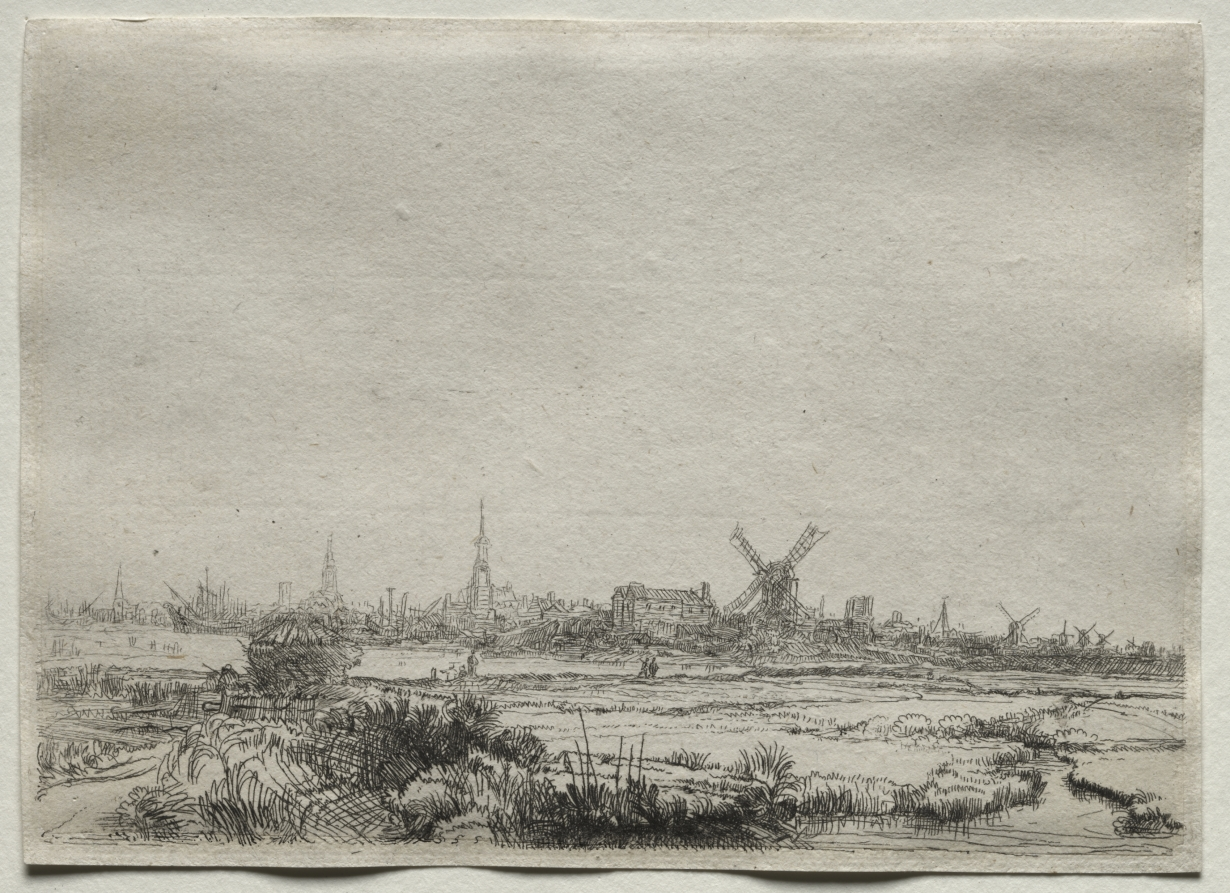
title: Copy of View of Amsterdam from the North West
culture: Netherlands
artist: copy after Rembrandt van Rijn (Dutch, 1606–1669)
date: 1700s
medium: etching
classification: Print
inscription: VERSO, upper left, in graphite: 10[sideways] ; lower right, in graphite: a 41938 ; lower center, in graphite: original ; lower right, in graphite: N [x vx?] ; lower right, in graphite: 1520/10[upsidedown]